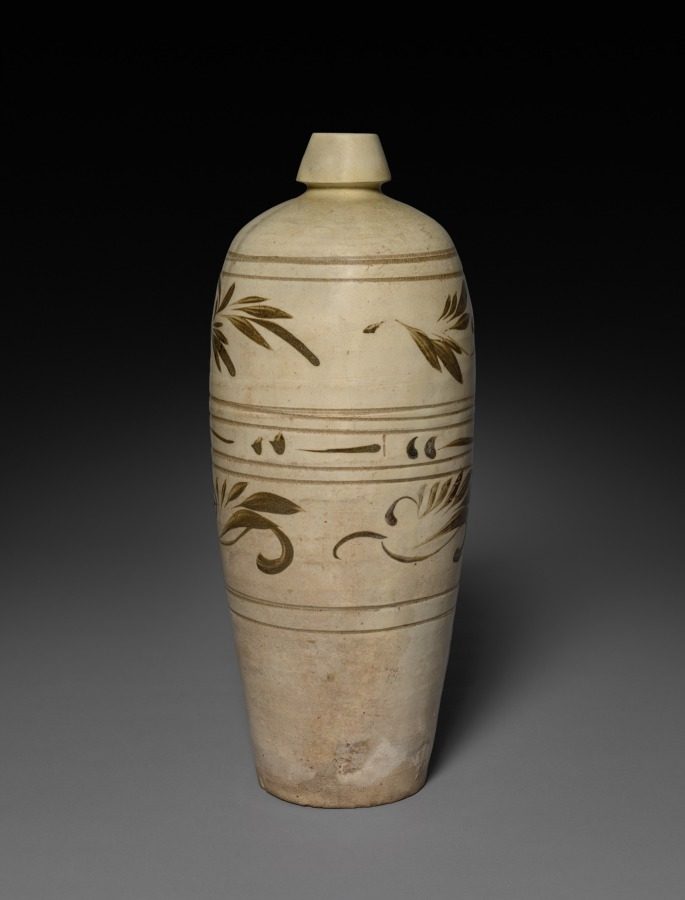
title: Meiping (Plum Blossom) Vase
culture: China, Northern Song dynasty (960-1127) - Jin dynasty (1115-1234)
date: 1100s–1200s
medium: Buff stoneware, slip coated with painted underglaze decoration, Cizhou ware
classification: Ceramic